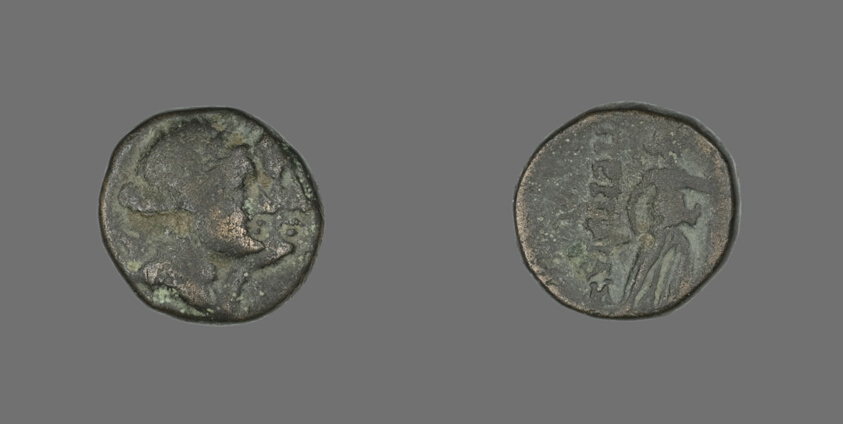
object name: Coin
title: Coin Depicting the God Apollo and the Goddess Artemis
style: greek, ancient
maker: Greek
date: 2nd-1st century BCE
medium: Bronze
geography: Ancient Greece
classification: coin; ancient art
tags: gods (deities), goddesses